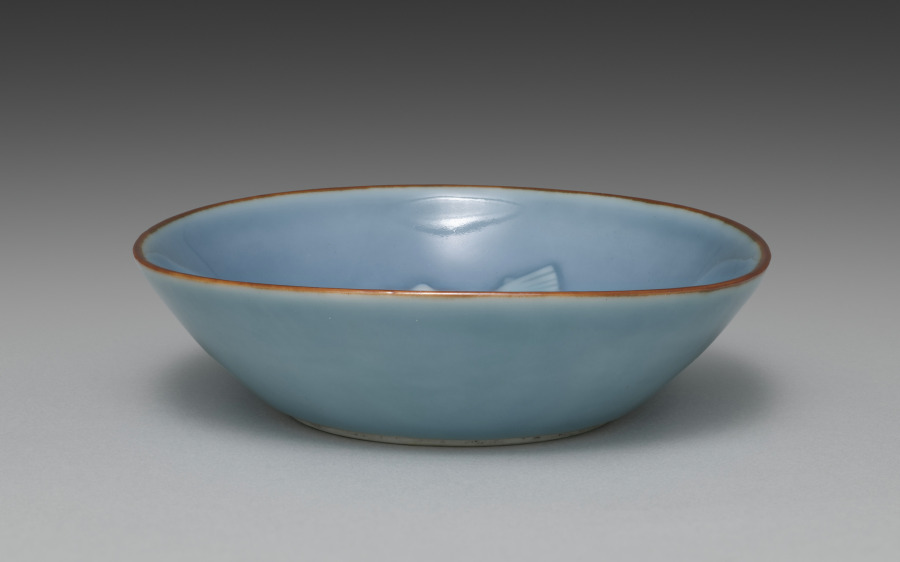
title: Dish from Dishes with Shells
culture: Japan, Taishō period (1912–26)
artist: Seifū Yohei IV (Japanese, 1872–1951)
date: 1914–46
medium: One from a set of five dishes; porcelain with blue glaze, iron oxide, and molded design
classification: Ceramic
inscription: 清風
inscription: 清風造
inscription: 清風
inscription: 成山清風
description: Yohei IV chose an aquatic theme for this set of five mukōzuke, side dishes. He added an iron oxide rim and used a concentrated blue glaze on both the interior and exterior. The glaze, named on the box lid, is his father’s “evening moon” (tsukiyoi) color. The conch in relief takes up the entire bottom of the dish. Up the sides are two snails on one end and on the other a scallop. This results in a boldly graphic, less realistic effect.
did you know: This set of dishes, mukōzuke, could be used for serving small side dishes at a tea gathering.